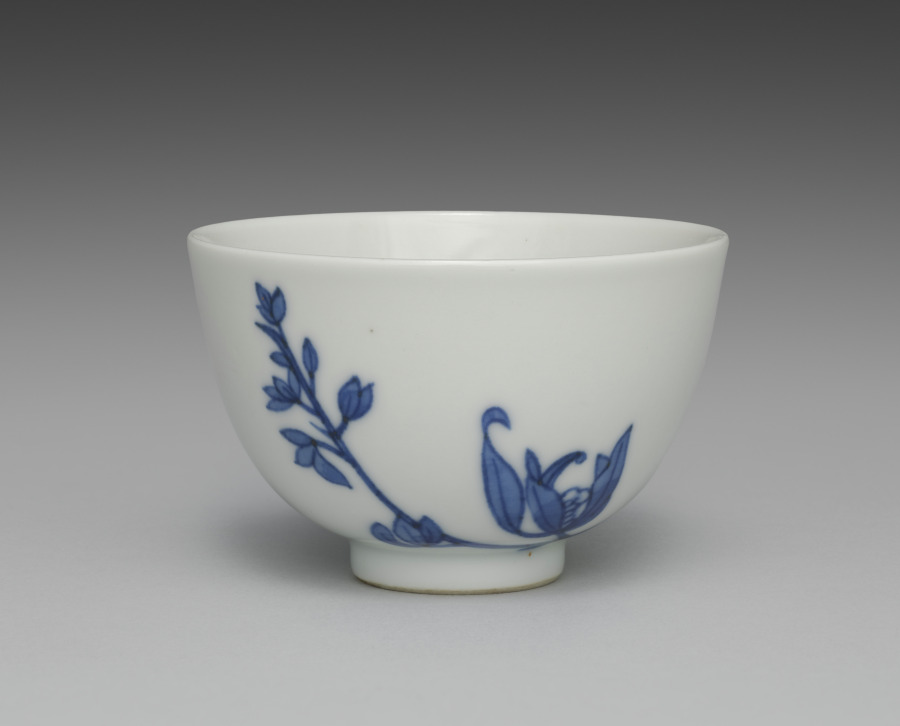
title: Teacup from Tea Set with Orchids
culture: Japan, Meiji period (1868–1912)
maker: Seifū Yohei III (Japanese, 1851–1914)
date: c. 1893–1914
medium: Porcelain with underglaze blue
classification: Ceramic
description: Although the teapot here is stored in a separate box from the five cups, these six pieces may once have been part of a tea set that included other tools such as a water cooler. The teacups have orchid flowers on both sides in underglaze blue, as well as a blue band inside the footring. The teapot has the same design and a blue band painted around the bottom of the lid’s knob. The cups’ long wood storage box is stamped on the exterior, over the lid and base, with a small red seal reading “Satō.” The same seal appears on five small squares of yellow textile, one placed in the bottom of each compartment in the teacup storage box. These are additional to the customary yellow cloths stamped with a “Seifu” seal. Interestingly, four of the Seifū cloths are stamped with an ovoid seal, while the remaining cloth, which is a slightly lighter color, has an unusual seal that is not quite gourd-shaped and with the fū of Seifū in a stylized, unrecognizable form. The teapot has its own box with a Satō seal and is wrapped with an orange textile stamped with the same unusual Seifū seal. A set with a very similar surface design is in the Brooklyn Museum. The Brooklyn set has a water cooler and a small pitcher, in addition to the teapot and cups, and all are in a single storage box. This box records the tea tools as made with kanpakuji, or “bright-jewel white porcelain,” counted among Yohei III’s most important inventions, and carved images. In fact, both sets have a white surface much closer in coloration to the cool white of porcelain clay used in Kyoto at the time, and the designs are simply painted. The Brooklyn set was thus likely mismatched at some point with a box intended for another tea set. Nonetheless, the box may have helped prevent the set’s original components from being dispersed, and the set itself provides insight into how the other tools from the present set may have looked.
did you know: This tea set with orchids has a side-handled pot called a kyūsu, used for steeping, straining, and serving tea.